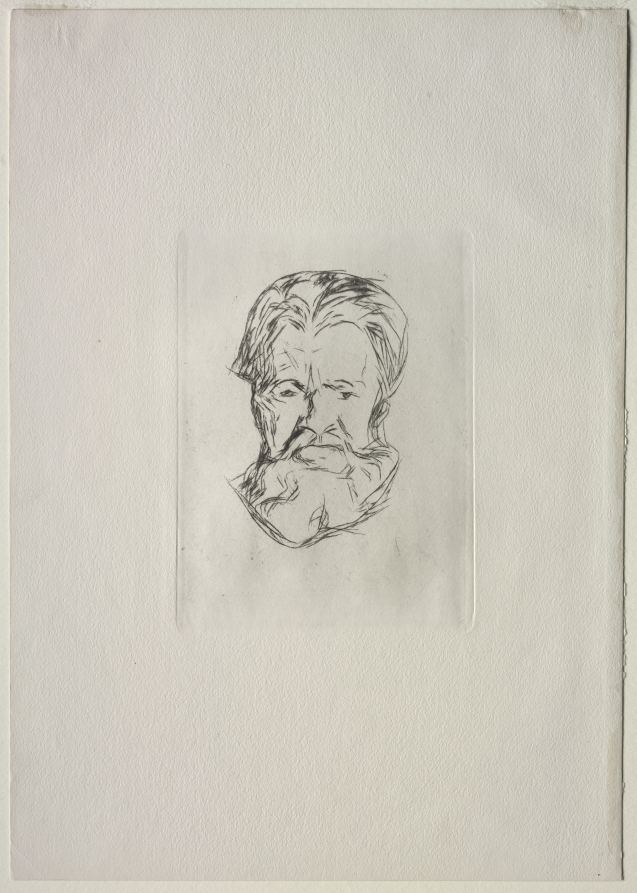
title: Head of a Man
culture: Norway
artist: Edvard Munch (Norwegian, 1863–1944)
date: 1906, printed 1917–18)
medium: drypoint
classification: Print